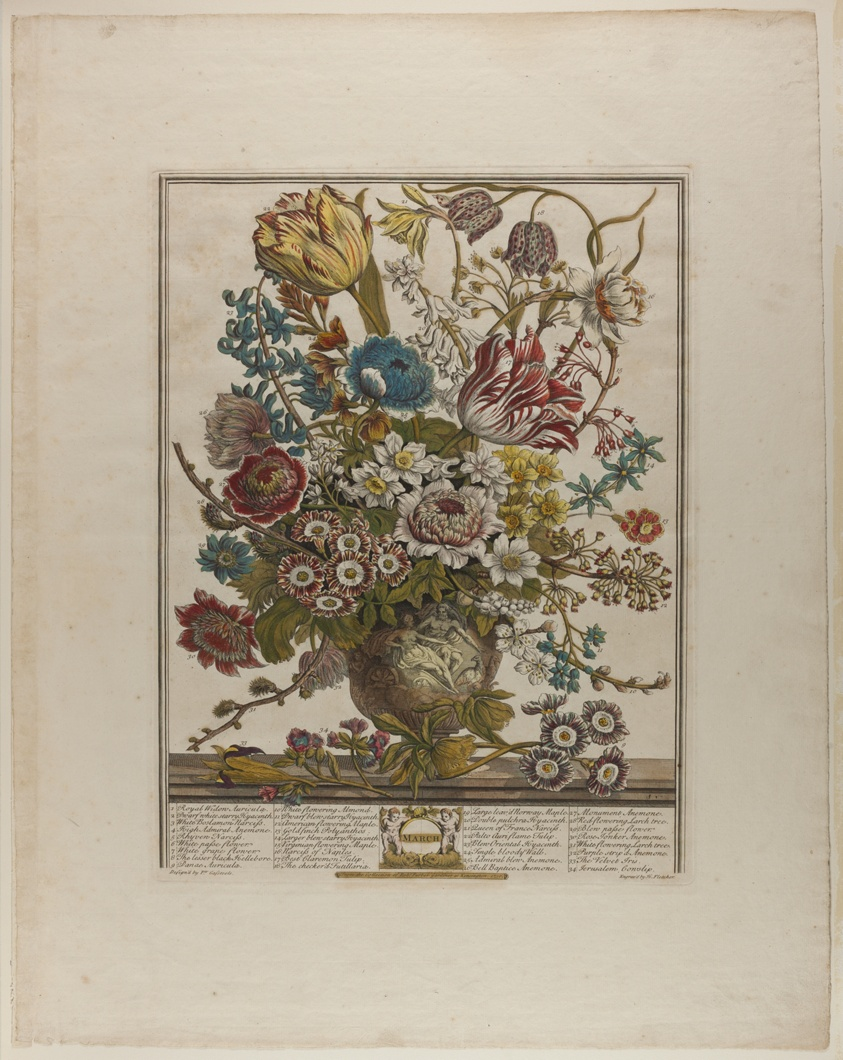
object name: Print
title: March, from Twelve Months of Flowers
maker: Henry Fletcher (English, 1710-1750); after Peter Casteels III (Flemish, 1684-1749)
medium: Engraving in black ink with opaque and translucent watercolor on cream laid paper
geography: England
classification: etching; print; prints and drawing